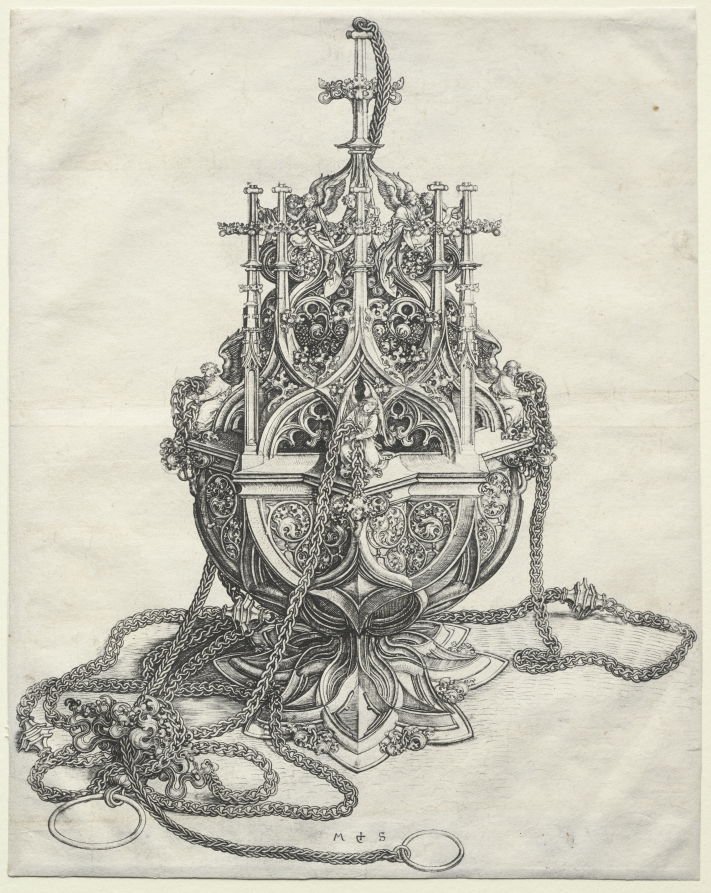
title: A Censer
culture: Germany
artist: Martin Schongauer (German, c. 1450–1491)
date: c. 1480–90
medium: engraving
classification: Print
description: Censers are liturgical containers swung back and forth on long chains to disperse incense during the celebration of the mass. In this print, Martin Schongauer exploited his early training as a goldsmith to create a detailed reproduction of a life-size censer. The exquisite filigree design of the openwork areas, and the minute figurines of angels holding chains that crumple on the ground and cast slight shadows suggest that Schongauer's Censer could have been a close replica of an existing censer, or a model for a goldsmith.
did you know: The vine-like ornament that covers the openwork areas of this censer suggests a Christological metaphor of the grapes made into the Eucharist wine.